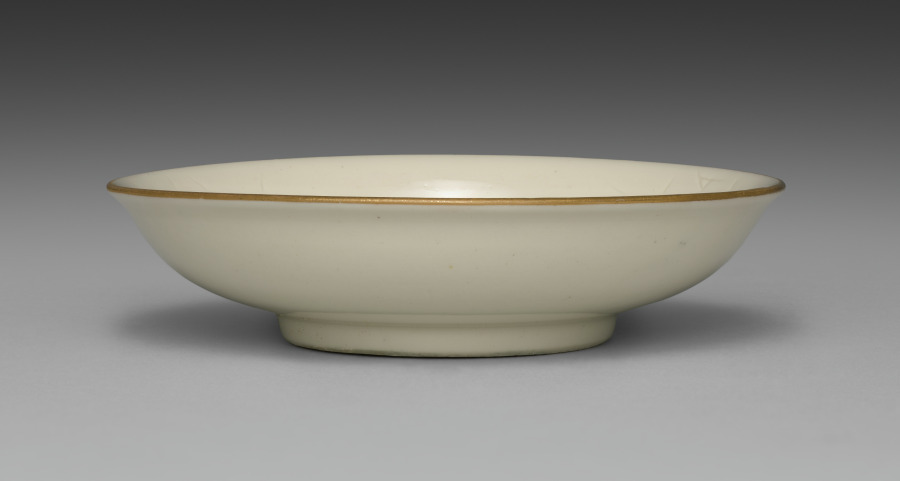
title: Small Dish from Dining Set with Plum Blossoms and Cracked-Ice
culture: Japan, Meiji period (1868–1912)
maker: Seifū Yohei II (Japanese, 1844–1878)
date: c. 1875–78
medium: Porcelain with molded designs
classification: Ceramic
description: Each item in this set has a delicate low-relief design of flowering plum branches over scattered, intersecting lines meant to resemble the cracked-ice surface of a frozen body of water and is signed on the base in gold pigment. While Yohei II produced many fine works in underglaze blue, like those produced by Kiyomizu Shichibei, he also made works in quite different styles later in his career, from the early 1870 s. In 1873, he was appointed purveyor to the Industrial Center of Kyoto Prefecture, a designation associated with Kyoto’s efforts to reach an international market through the port of Kobe; and from 1875 until his death, he was involved in national-level projects to present Japanese ceramics across the world. It was during this period that Yohei III was apprenticed to Yohei II, and it has been suggested that this set may in fact be an early example of Yohei III’s work, which he signed with his teacher’s name. Decorated with flowers resembling Japanese textile motifs, the set calls to mind the design of Yohei II’s pair of vases with plum blossoms in the Victoria and Albert Museum. Here, the elaborate trees created for a formal public exhibition setting have been translated into the approachable blossoms of the genteel domestic environment. While the designs are consistent across the pieces, each raised flower petal and pistil and each incised line in the ice was done by hand, so the cups, bowls, and dishes are similar yet unique. The bottoms of two boxes once identified the set’s owner, but the information has been deliberately obscured with black ink. However, inscriptions still visible appear to indicate two occasions, once at the end of July 1886 , and once again in June 1916 , when parts of the set were requested from Hokura in Niigata Prefecture. The location corresponds to a neighborhood in the present-day city of Jōetsu. The surname Tsuji 辻 also appears on a paper tag affixed to one of the box cloths. Future research may possibly reveal more about their provenance. A vase by Yohei III in a private collection combines the formal grandeur of the Yohei II vases in the Victoria and Albert Museum with the gentler design of this dining set, placing flowering plum trees against soft, scalloped-edge clouds resembling those in golden screens.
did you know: The dining wares have a creamy white coloration that the four boxes containing them identify as Korean in style.